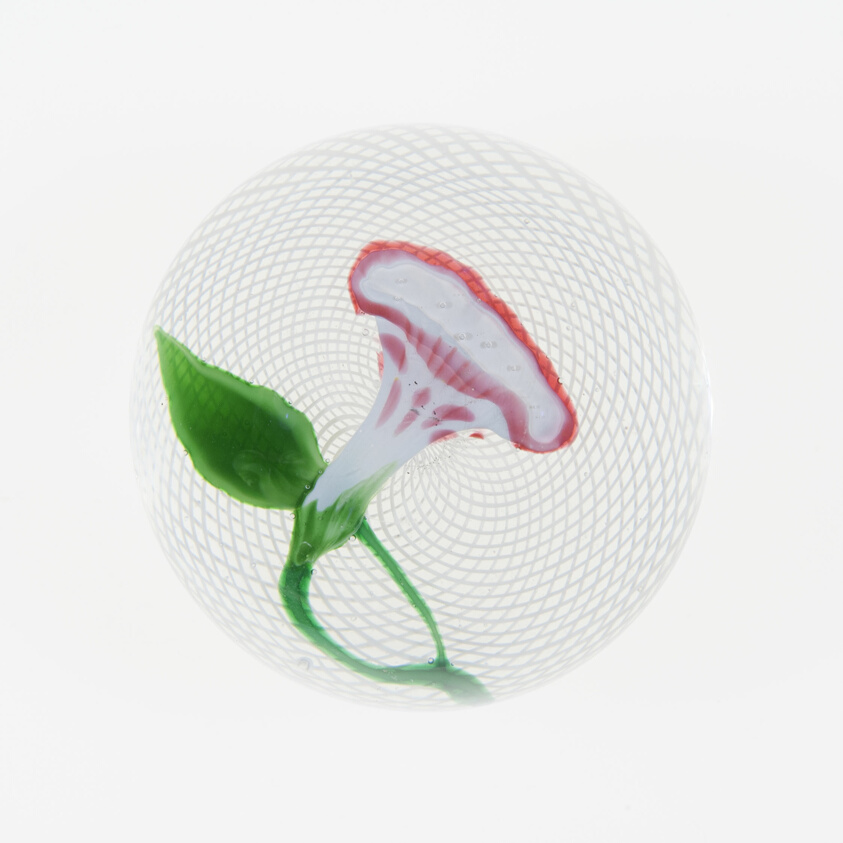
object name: Glass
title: Paperweight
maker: Clichy Glassworks (Cristalleries de Clichy); Clichy, France, 1837-1885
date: 19th century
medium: Glass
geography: Clichy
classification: paperweight; lampwork; european decorative arts; glass